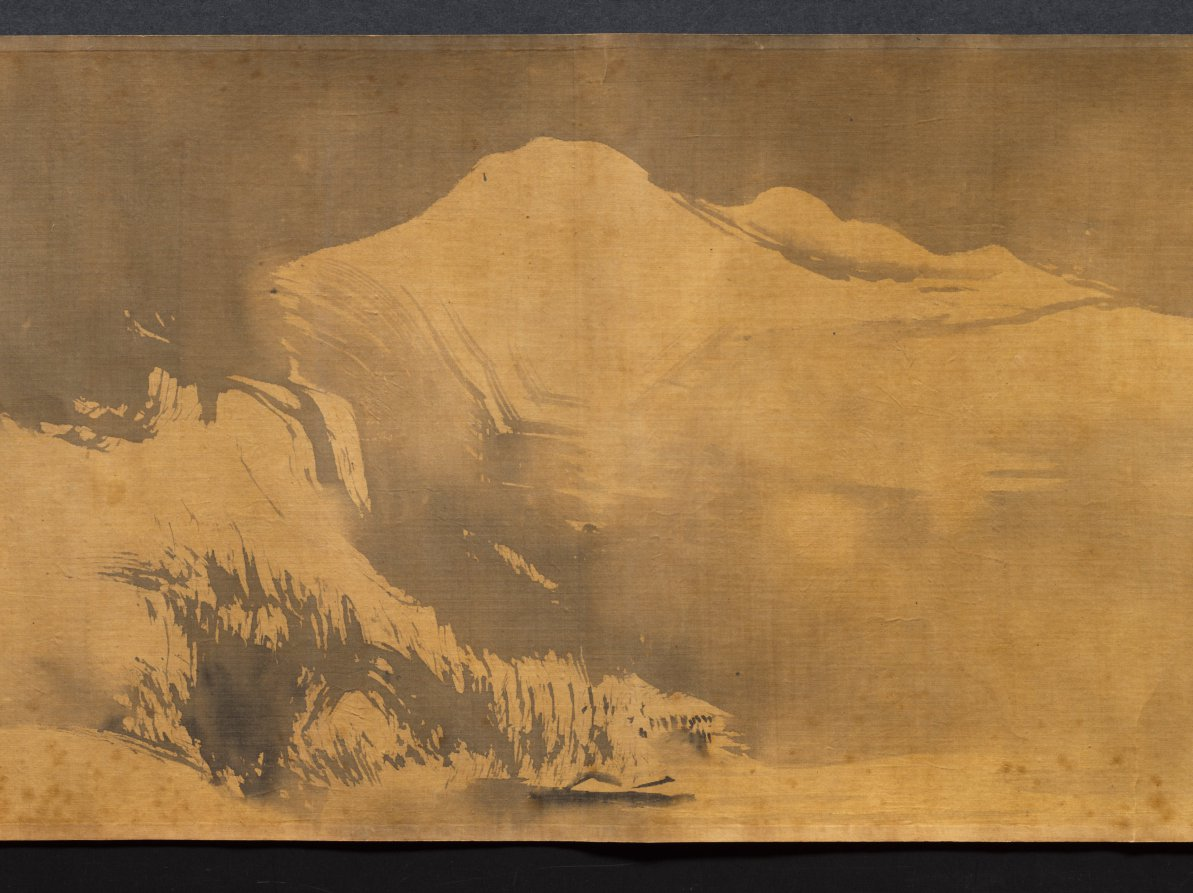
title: Eight Views of Xiao-Xiang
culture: Japan, Edo period (1615–1868)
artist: Kano Tan’yū (Japanese, 1602–1674)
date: 1615–1868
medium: handscroll; ink on silk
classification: Painting